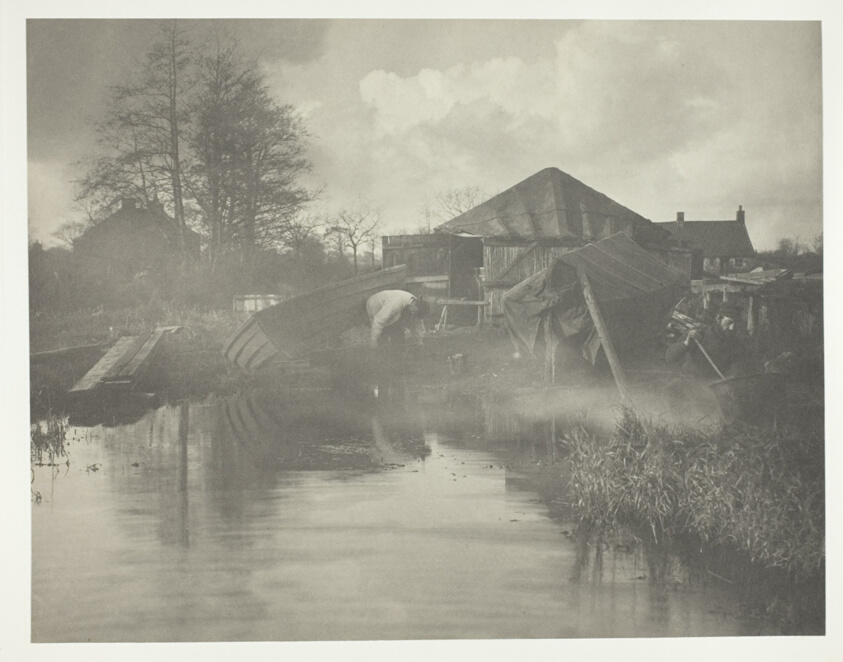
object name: Photograph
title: A Norfolk Boat-Yard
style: 19th century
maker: Peter Henry Emerson (English, born Cuba, 1856–1936)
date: 1886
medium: Platinum print, pl. XIII from the album "Life and Landscape on the Norfolk Broads" (1886)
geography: England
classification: platinum print; photographic process; photography; photograph